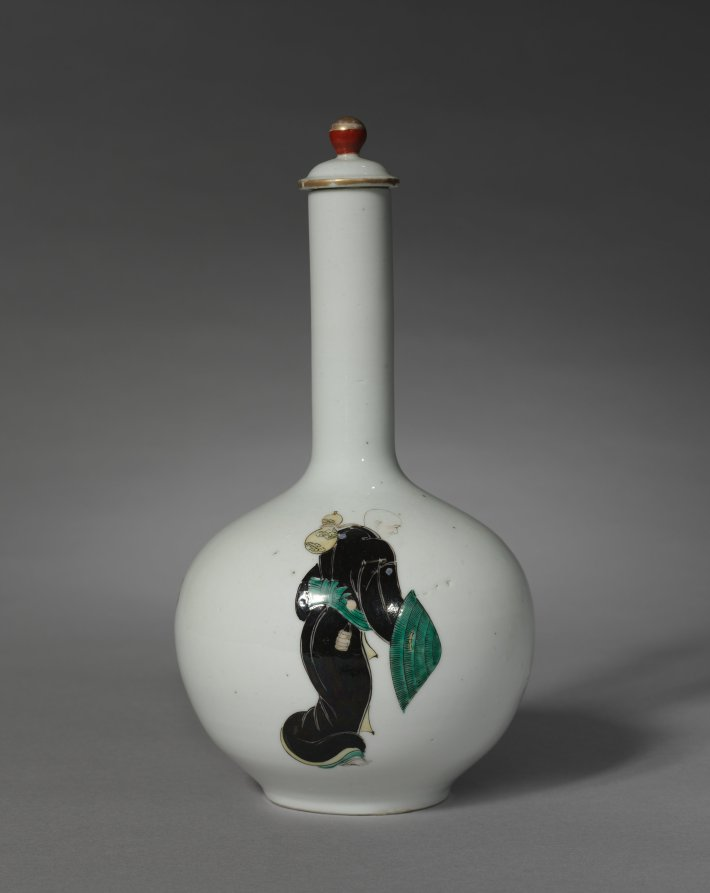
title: Sake Bottle with Three Figures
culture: Japan, Edo period (1615–1868)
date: late 1700s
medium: porcelain with overglaze enamel and gold decoration (Hizen ware, Arita type)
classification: Ceramic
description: The bottle features three elegantly drawn figures: a beautiful woman, a young man, and a priest. The artist used a fine-haired brush to draw these figures in colored enamel onto the porcelain bottle, which had already been given a clear glaze. A final firing fused the enamel to the form. The name derives from the port of Imari from where Japanese porcelains were shipped to other cities in Japan, China, and Europe.